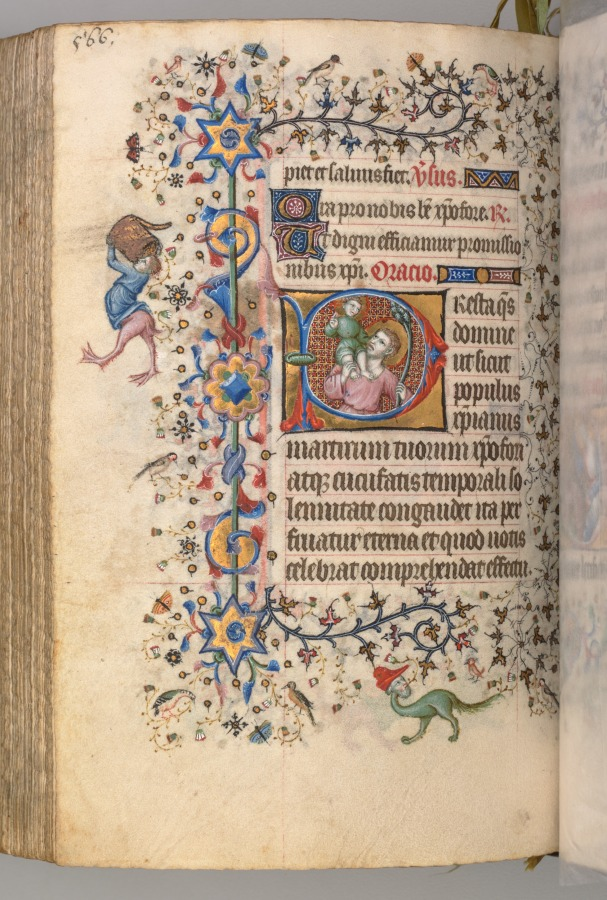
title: Hours of Charles the Noble, King of Navarre (1361-1425): fol. 277v, St. Christopher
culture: France, Paris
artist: Master of the Brussels Initials and Associates (French)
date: c. 1405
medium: ink, tempera, and gold on vellum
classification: Bound Volume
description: This precious volume was obviously highly prized by its owner, the French-born King of Navarre, who had his coat of arms painted on no less than twenty folios. Rather than directly commissioning this manuscript from a specific workshop, it seems that Charles the Noble acquired his book of hours -- perhaps ready-made for the luxury market -- while on a trip to Paris in 1404-05. A collaborative effort, six painting styles are evidenced within the pages of this codex, those of two Italians, two Frenchmen, and two Netherlanders. The painter who was responsible for the planning and decoration of the book, and who produced seventeen of the large miniatures, was a Bolognese artist known as the Master of the Brussels Initials. His principal assistant, responsible for most of the borders, was a Florentine who signed his name "Zecho" da Firenze on folio 208 verso.